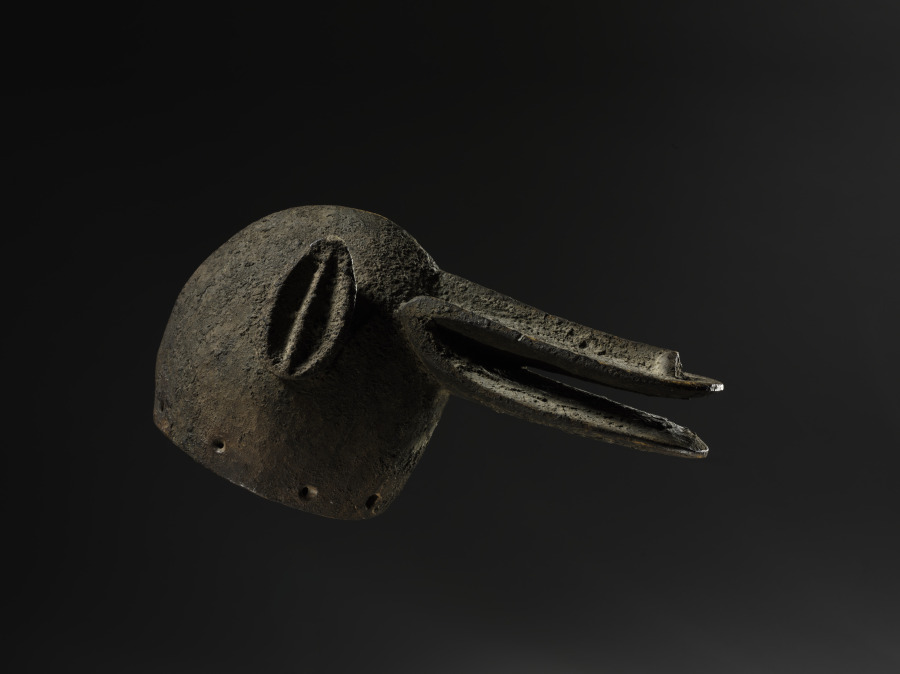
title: Helmet Mask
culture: Africa, West Africa, Mali, Bamana-style blacksmith-carver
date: possibly early to mid-1900s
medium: Wood and organic materials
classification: Mask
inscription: The inside of the mask bears the inscription with white ink of the number 107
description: Belonging to the Kono association, one of the Bamana people’s most powerful men’s groups, this mask’s shape seems to evoke the hyena, an animal reputed for its intelligence and its knowledge of the bush. The Kono’s main task is to offer its members protection against witchcraft. It is also responsible for fostering fertility, solving conflicts, disciplining troublemakers, and sentencing criminals. Masquerades are among the Kono’s most public expressions; the mask’s performance is characterized by energy and vigor.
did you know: This mask likely depicts a hyena, an animal known for its intellect and knowledge of the bush.